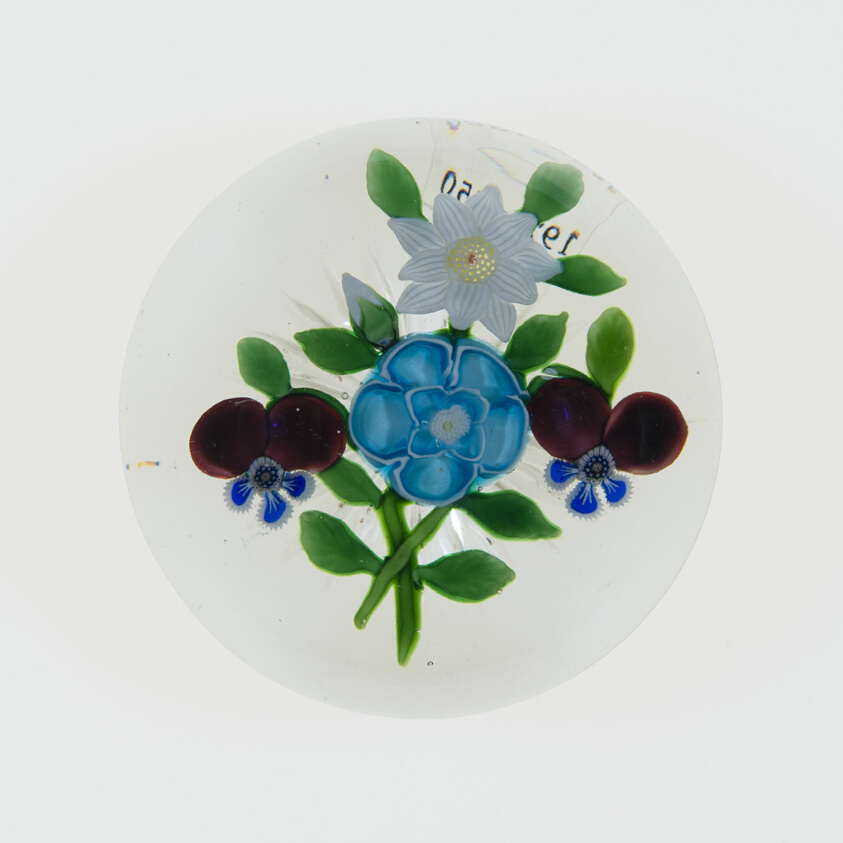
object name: Glass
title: Paperweight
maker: Baccarat Glassworks (Cristalleries de Baccarat); Lorraine, France, founded 1764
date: c. 1848–55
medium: Glass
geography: Lunéville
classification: paperweight; lampwork; european decorative arts; glass